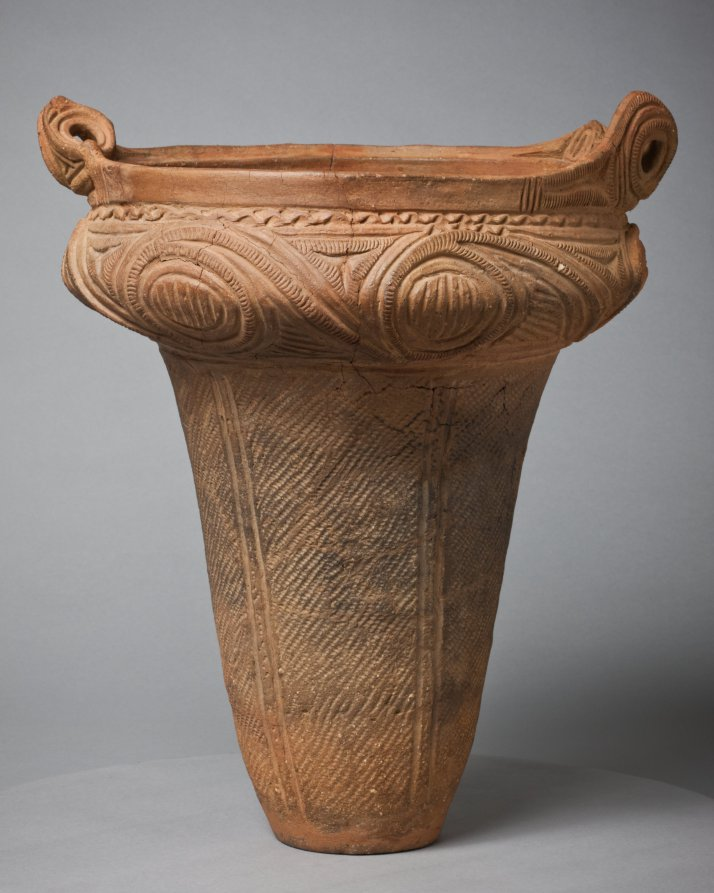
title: Urn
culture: Japan, Jōmon period (c. 10,500–300 BCE)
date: c. 2000 BCE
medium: earthenware, terracotta, impressed and incised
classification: Ceramic